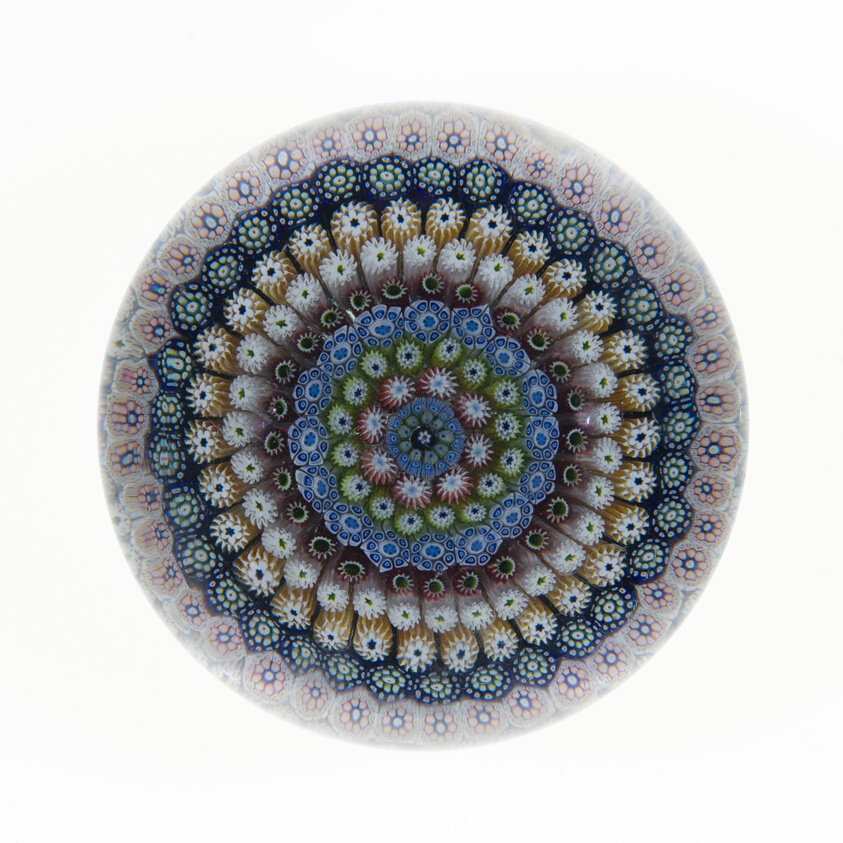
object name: Glass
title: Paperweight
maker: Saint-Louis Glassworks (Cristalleries de Saint-Louis); Lorraine, France, founded 1586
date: 19th century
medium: Glass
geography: Saint-Louis-lès-Bitche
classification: paperweight; glass